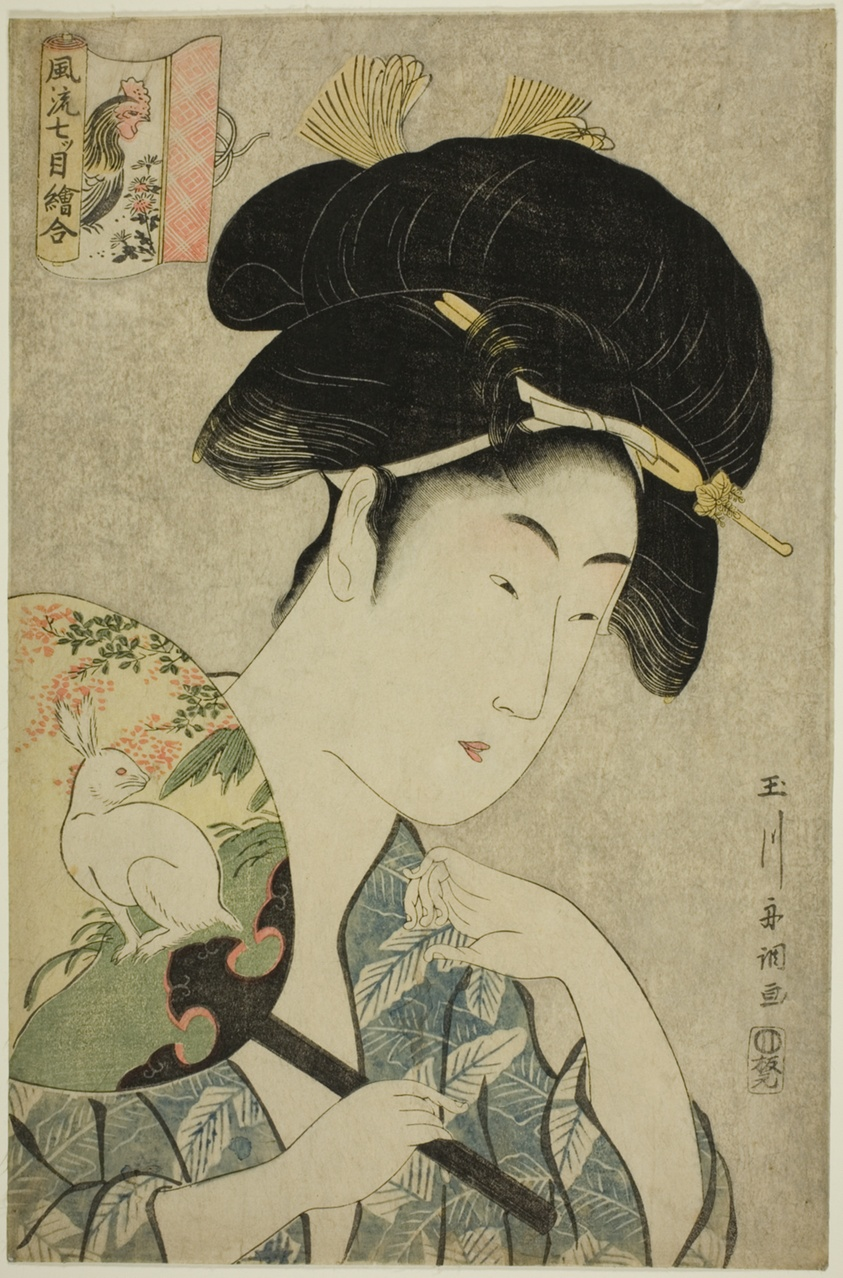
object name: Print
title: An Elegant Series of Amulet Paintings (Furyu nanatsume e awase): Rabbit and Cock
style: Japanese (culture or style)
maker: Tamagawa Shucho; Japanese, 18th century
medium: Color woodblock print; oban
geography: Japan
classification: woodblock print; print; asian art